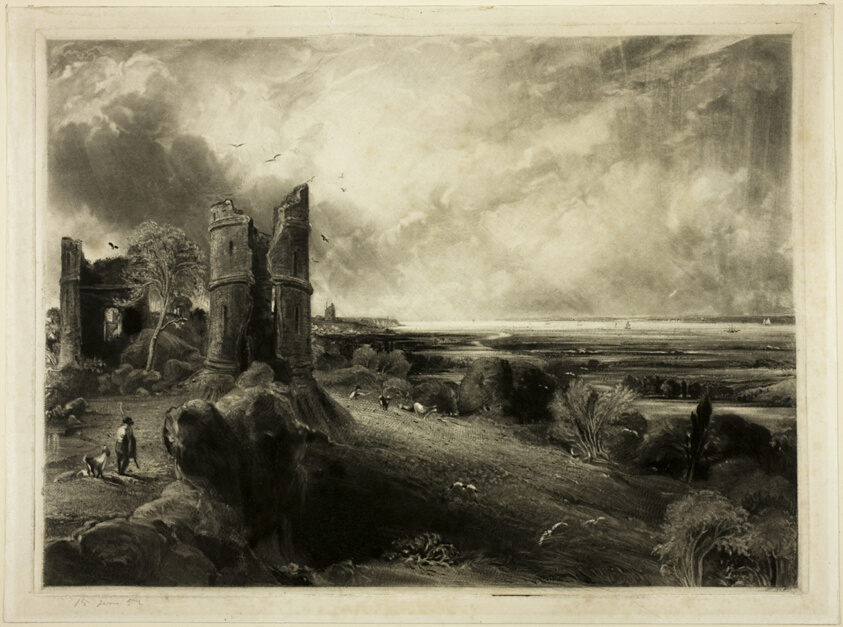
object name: Print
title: Hadleigh Castle Near the Nore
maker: David Lucas (English, 1802-1881); after John Constable (English, 1776-1837)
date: 1831–32, published 1832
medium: Mezzotint on paper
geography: England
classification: mezzotint; print; prints and drawing